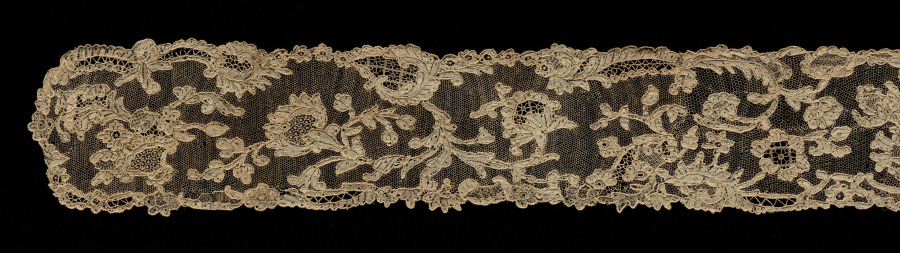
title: Lace Edging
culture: France, Alençon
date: 1715–74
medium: Linen: needle lace (Point d'Alençon)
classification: Lace